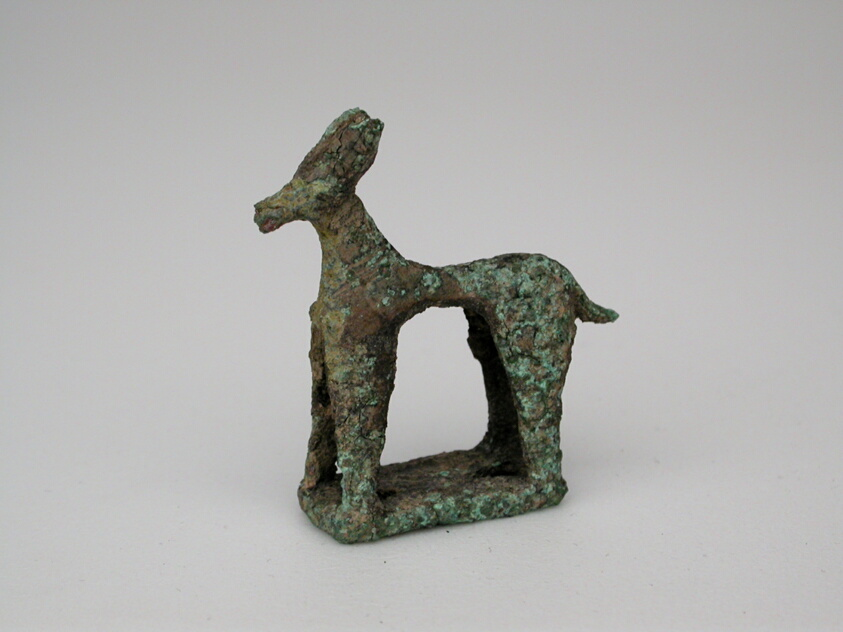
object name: Sculpture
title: Seal with Quadruped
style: geometric, ancient, greek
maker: Greek; Thessaly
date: Geometric Period (800–600 BCE)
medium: Bronze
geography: Thessalía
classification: votive offering; seal; ex-voto; sculpture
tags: animals